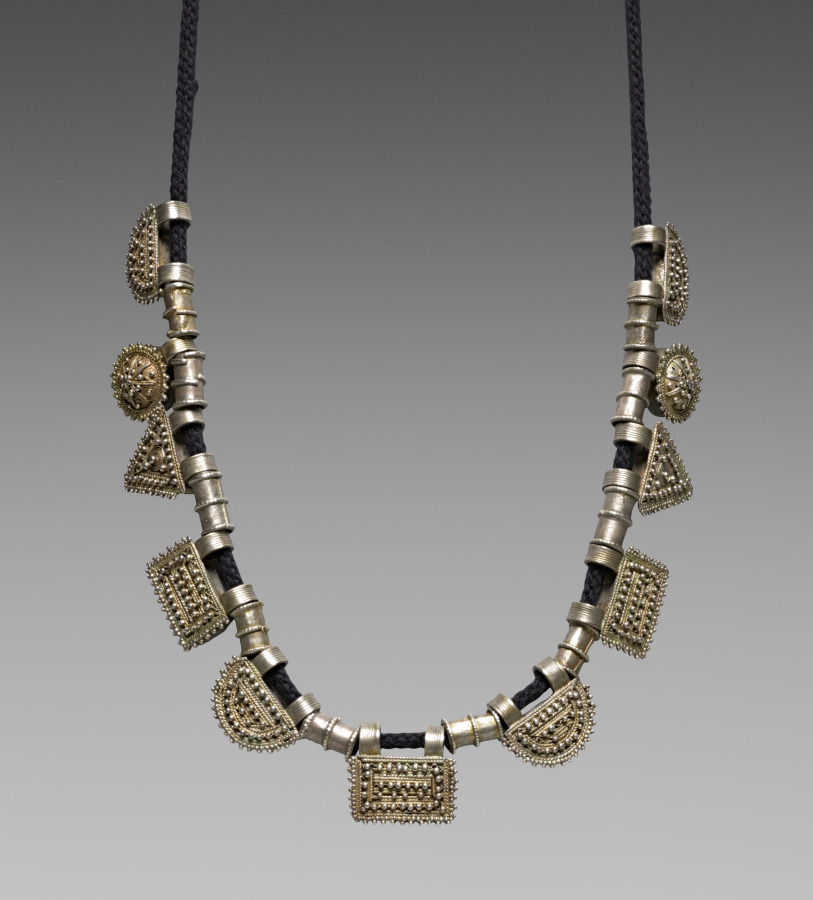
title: Necklace (ashän ketab) with amulet pendants (tälsäm)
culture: Africa, East Africa, Ethiopia, unknown silversmith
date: late 1800s or early 1900s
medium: silver alloy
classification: Jewelry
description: Ornate filigree jewelry was historically made in Ethiopia for royals and nobility by specialized silversmiths trained through long apprenticeships. This silver necklace is composed of numerous box-shaped amulet pendants (tälsäm) meant to ward off the evil eye or other dangers. Linked to Islamic amuletic practices, the boxes are effective whether empty or whether they contain magical or prayerful texts. Their fine filigree and granulation work is characteristic of Harar as well as the Ethiopian Orthodox Christian city of Aksum.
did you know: Ethiopian silver jewelry is made by melting high-purity Maria Theresa thaler coins made from the 1700s to the 1900s.